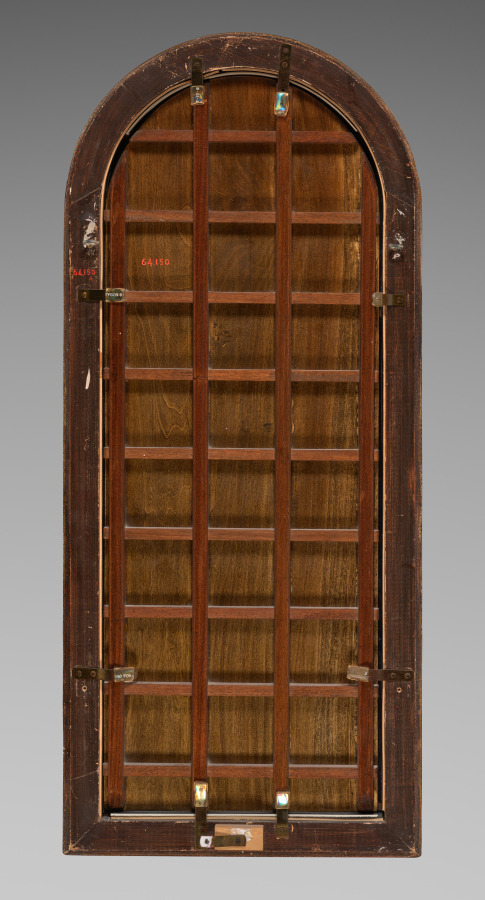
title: Panel from a Triptych: The Archangel Michael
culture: Italy, Florence, 15th century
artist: Fra Filippo Lippi (Italian, c. 1406–1469)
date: 1458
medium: tempera on wood panel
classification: Painting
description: These panels depicting Saints Anthony the Abbot and Michael originally flanked a central scene of the Madonna and Child with Angels, now lost, to form a triptych. Giovanni di Cosimo de’Medici of Florence commissioned the ensemble in 1457 as a gift to Alfonso V of Aragon. Fra Filippo Lippi, a Carmelite friar and one of the great masters of early Renaissance Florence, depicted realistic, weighty figures in a three-dimensional space using a system of linear perspective, inspired partly by Masaccio’s Brancacci Chapel, and reflected in the background architecture. Saint Anthony the Abbot rejected all earthly possessions in pursuit of a contemplative life in the desert. He is generally regarded as the founder of monasticism and is depicted wearing a monk’s habit. Saint Michael’s sword and shield refer to his role as heaven’s defender against evil.